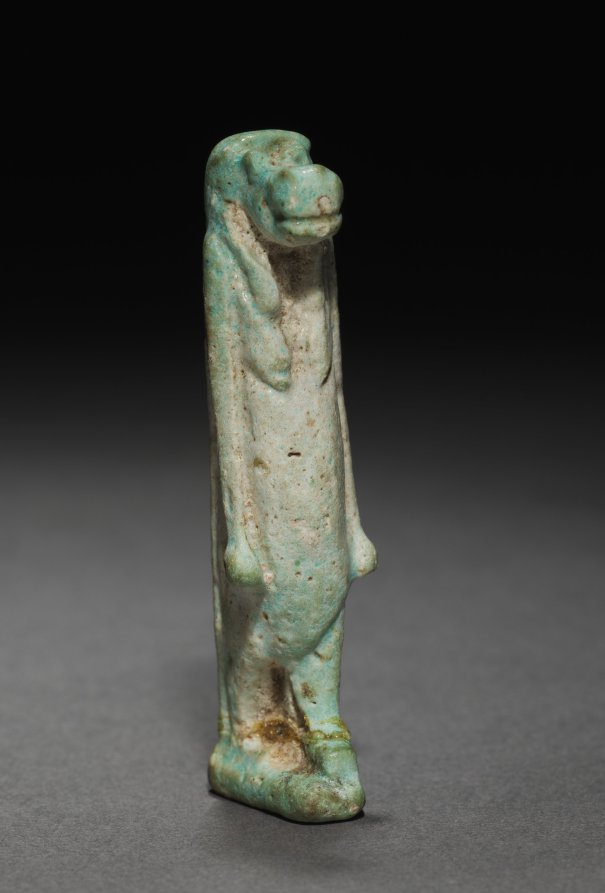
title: Amulet of Taweret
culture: Egypt, Greco-Roman period (332 BCE–395 CE), Ptolemaic dynasty (305–30 BCE)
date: 305–30 BCE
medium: light robin's egg blue faience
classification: Amulets